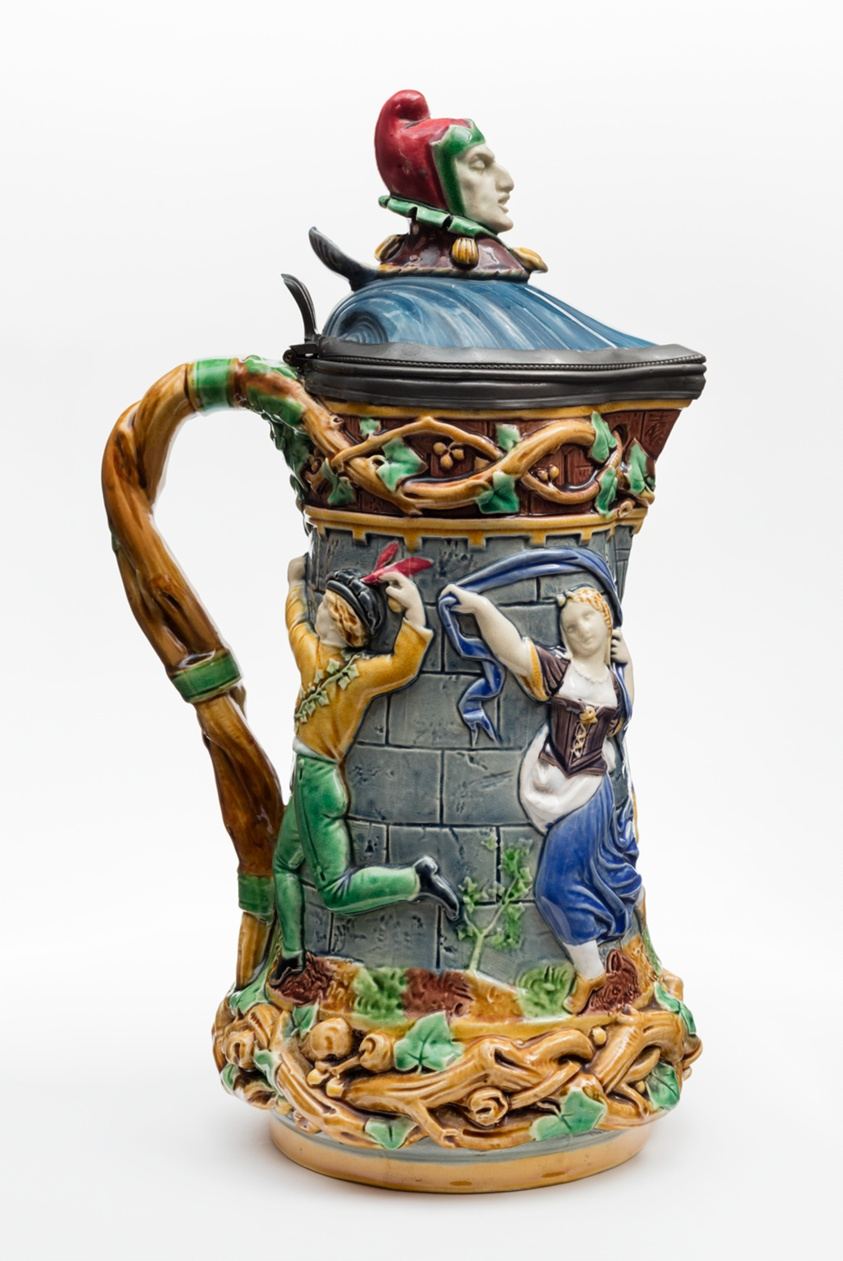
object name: Ceramics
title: Tower-Jug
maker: Minton Pottery and Porcelain Factory; Stoke-on-Trent, England, founded 1793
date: 1872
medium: Tin glazed earthenware with pewter mounts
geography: England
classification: ceramics